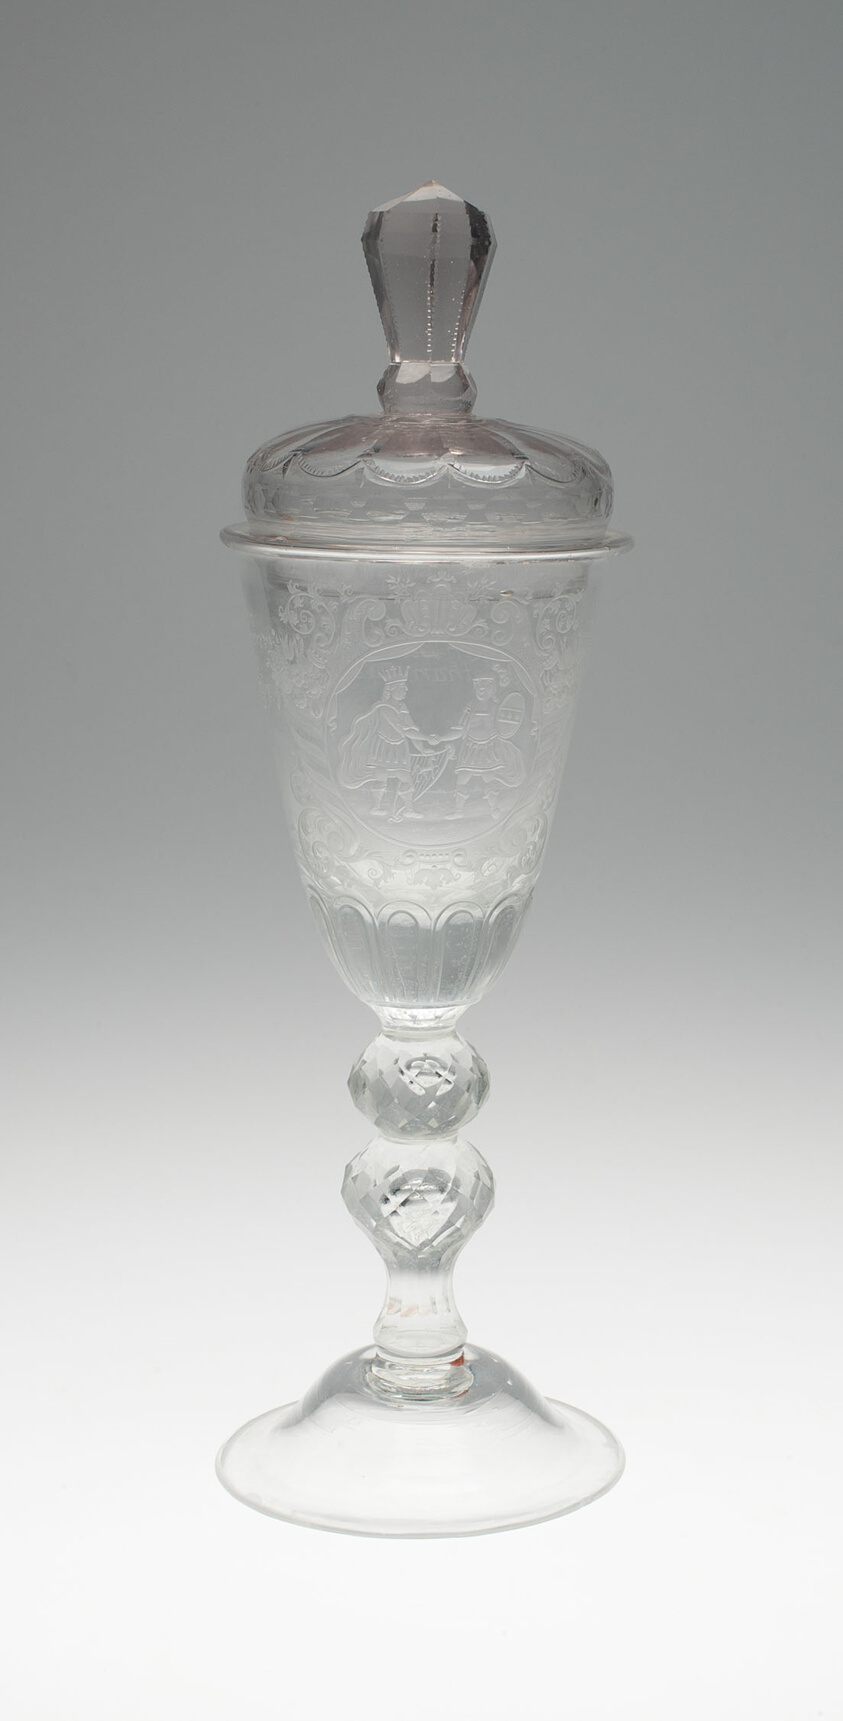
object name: Glass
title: Goblet with Cover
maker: Germany, Lauenstein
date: c. 1730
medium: Glass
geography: Lauenstein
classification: drinking vessel; glass; european decorative arts